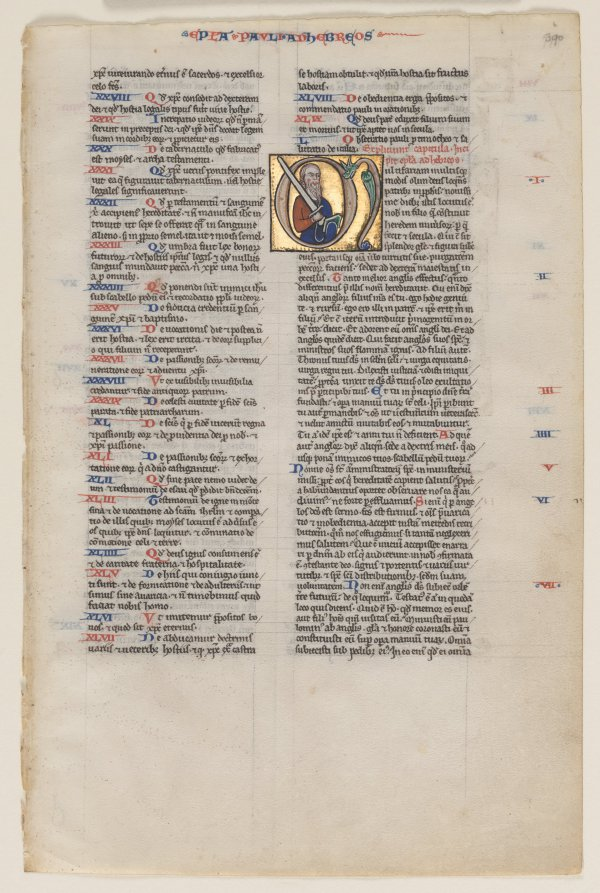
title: Leaf with Initial from a Latin Bible: Initial M: St. Paul with a Sword and a Book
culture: France, Paris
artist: Vienna Moralized Bible Workshop (French)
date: c. 1220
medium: ink, tempera and burnished gold on vellum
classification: Manuscript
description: Introducing Saint Paul's Epistle to the Hebrews, the text reads: Multifariam et multis modis olim Deus loquens patribus in prophetis (In many and various ways God spoke of old to our fathers by the prophets). The historiated initial M shows Saint Paul holding a sword, the instrument of his martyrdom, in his right hand. According to tradition, Paul was beheaded outside the gates of Rome. In his left hand he holds a book, indicating that he is the author of the Epistles of the New Testament. A Roman citizen and Christian missionary, Paul wrote his Epistle to the Hebrews to a community of Hebrew Christians. Of the many manuscript workshops active in Paris between about 1200 and 1250, only a handful have been identified by actual name. The figural style of the Vienna Moralized Bible Workshop is noted for its treatment of hair and eyes, the red dots of the cheeks, and the draperies with hairpin folds. The artist has drawn his inspiration from the animal-shaped initials of the previous century by converting the second arch of the M into a winged dragon.